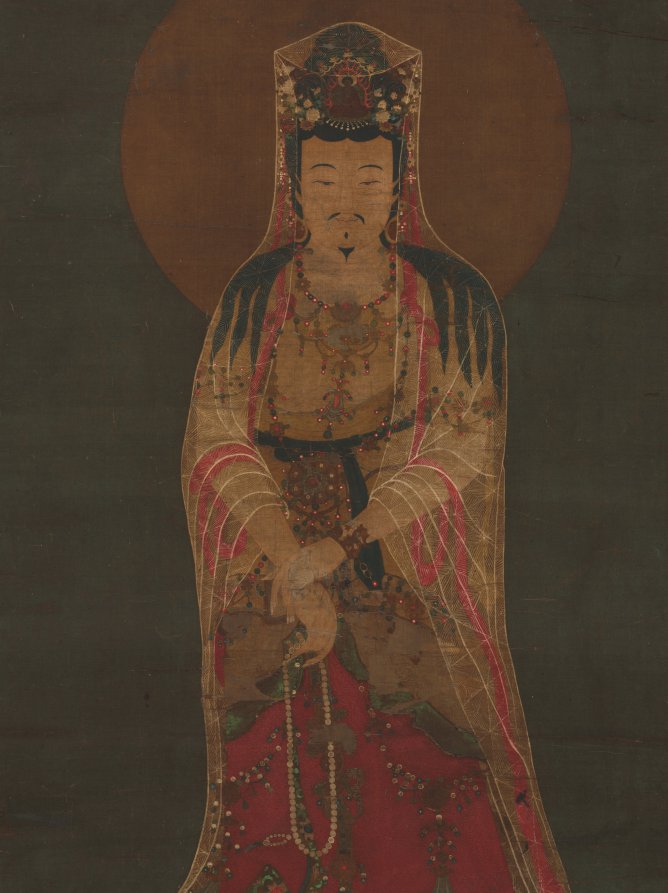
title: Kannon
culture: Japan, Meiji period (1868–1912)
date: c. 1868–1912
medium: hanging scroll; ink and color on silk; inscription in gold ink on silk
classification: Painting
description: The bodhisattva Avalokiteshvara (Kannon in Japanese) stands with each of his feet upon a lotus blossom. The Buddha Amitabha (Amida in Japanese) appears in his headdress. The text written in golden characters attached to the top of the painting is a portion of a religious text extolling the virtues of the bodhisattva. The painter was inspired by Buddhist paintings of the Korean Goreyo period (918–1392); he attempted to reproduce the diaphanous shawl sometimes seen in such early works.